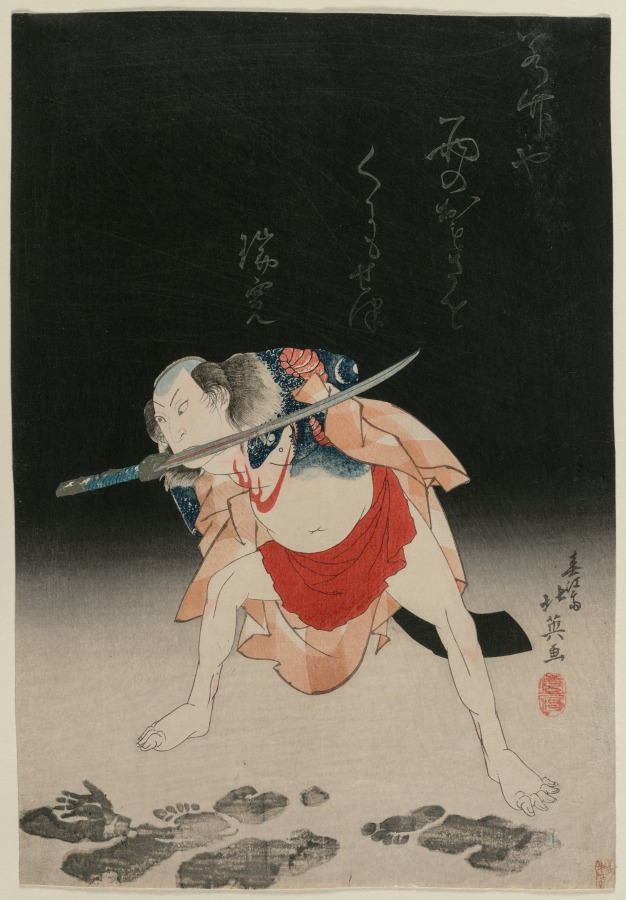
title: Arashi Rikan II as Danshichi Kurōbei in "Mirror of Naniwa: The Summer Festival"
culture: Japan, Edo period (1615–1868)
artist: Shunbaisai Hokuei (Japanese, d. 1837)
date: 1832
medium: color woodblock print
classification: Print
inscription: Signature: Shunkosai Hokuei ga. seal: Shunko.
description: This print shows Arashi Rikan II (1788–1837) acting in a Kabuki play put on at the Chikugoza Theater in Osaka in 1832. Rikan’s character, Danshichi Kurōbei, was among the otokodate roles, or men who stood up for those without much power in society. Mirror of Naniwa: The Summer Festival remains popular today and has the most well-known Kabuki murder scene, in which Danshichi kills his devious father-in-law, Mikawaya Giheiji. Rikan strikes multiple dramatic poses, called mie, during the episode, which features real mud on the stage.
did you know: This belongs to a category of Japanese prints called “actor images” (yakusha-e or 役者絵), which were collected by fans of popular Kabuki actors.